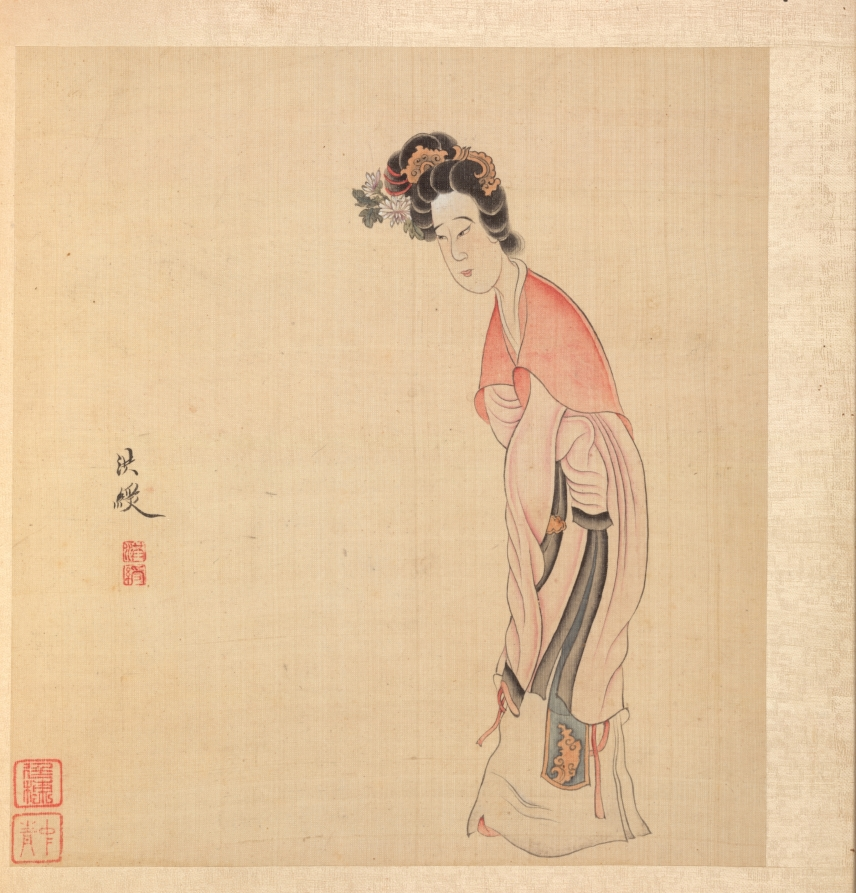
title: Paintings after Ancient Masters: A Lady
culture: China, Ming dynasty (1368–1644)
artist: Chen Hongshou (Chinese, 1598/99–1652)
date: 1598–1652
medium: album leaf, ink and color on silk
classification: Painting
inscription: Hongshou. [seal] Hongshou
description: The twenty paintings in this double-album by Chen Hongshou include landscapes, figures, and flowers. It also has one leaf featuring a woman, an often-used subject not found in the other albums from the latter part of his career. His late works are wonderful summations of Chen's peculiar and quirky art--archaistic, hyper-refined--but without accompanying shallowness or sentimentality. His figures and landscapes in the late albums are miniaturized, not unlike the small Chinese gardens, or the carefully selected small table rocks or old roots used for contemplation to see the world in miniature. This loss of scale is quite deliberate and reflects the psychological situation of a depressed class like the Ming loyalist officials and scholars, deprived of their integrity and honor, and forced to lead a diminished and restricted existence.